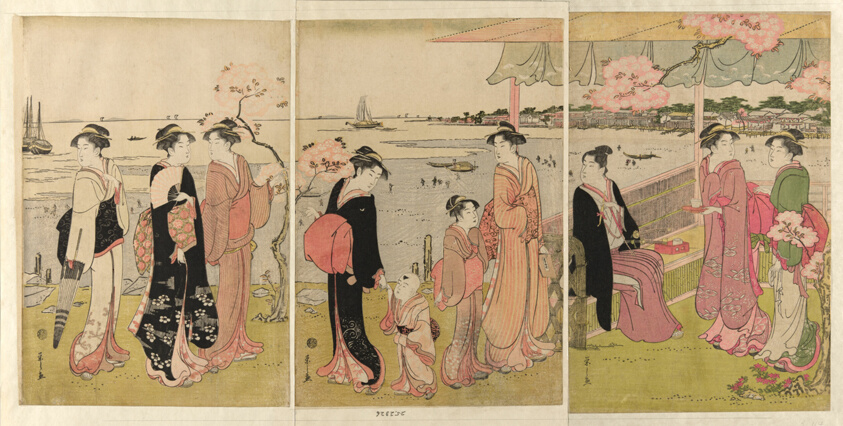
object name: Print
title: Watching the Shellfish Gathering during Low Tide at Shinagawa (Shinagawa shiohigari kenbutsu)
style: Japanese (culture or style)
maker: Chobunsai Eishi; Japanese, 1756-1829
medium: Color woodblock prints; oban triptych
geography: Japan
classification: woodblock print; print; asian art